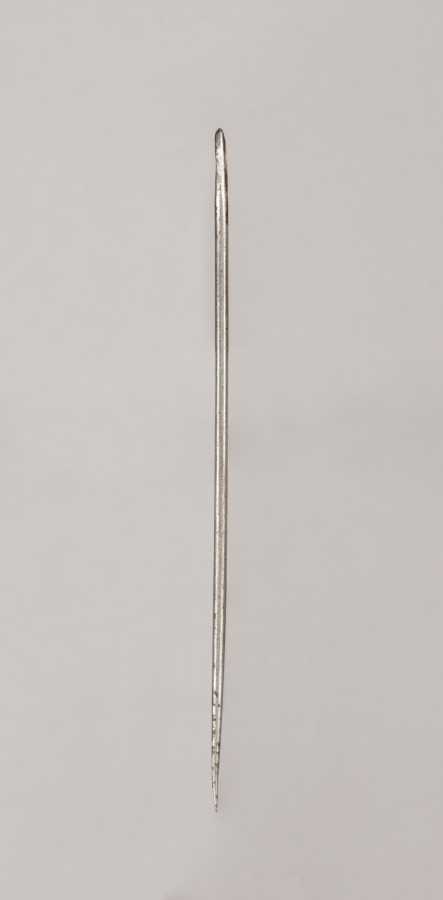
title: Scabbard Needle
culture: Africa, East Africa, Sudan, unknown maker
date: 1880–1910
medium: metal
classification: Arms and Armor